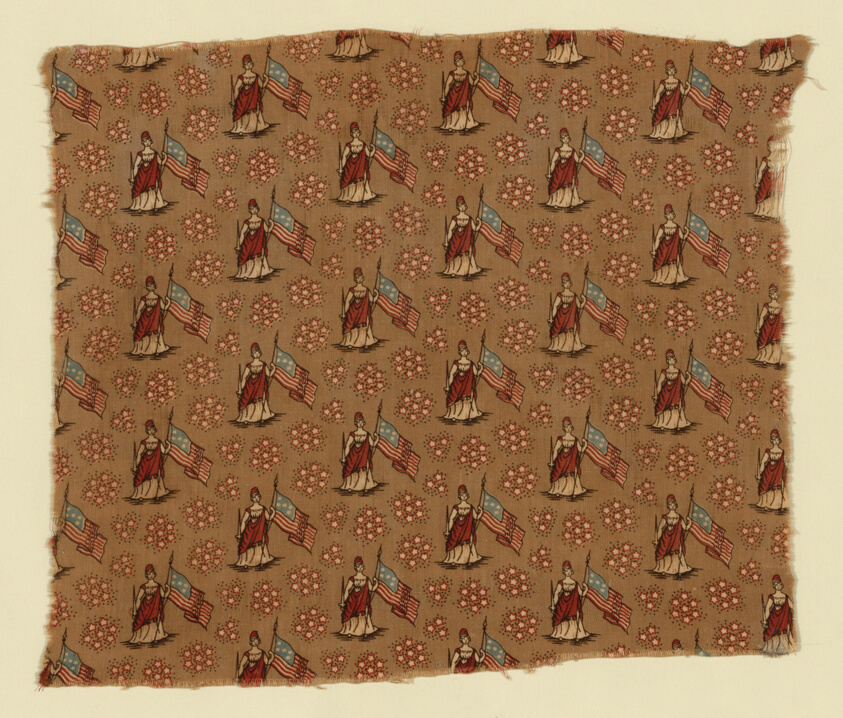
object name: Textile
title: Fragment (Furnishing Fabric)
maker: United States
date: c. 1876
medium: Cotton, plain weave; engraved roller printed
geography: United States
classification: textile; weaving - printed; furnishing textile